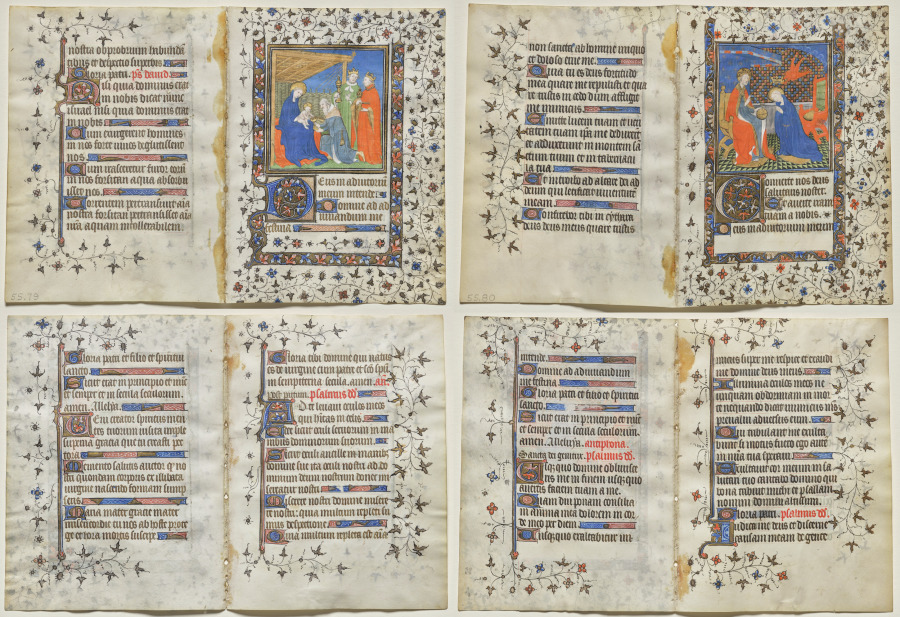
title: Pair of Bifolio from a Book of Hours: Adoration of the Magi and Coronation of the Virgin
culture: France, Paris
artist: workshop of Boucicaut Master (French, Paris, active about 1410–25)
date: c. 1415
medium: ink, tempera, and gold on vellum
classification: Manuscript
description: Books of hours were devotional books popular in the Middle Ages. Meant for laypeople, or those not in the clergy they were used at home and contained daily prayers as well as prayers for specific occasions, such as death, plague, warfare, travel, or bad weather. The heart of every book of hours is the Hours of the Virgin. With this set of prayers, the reader asked the Virgin Mary to intercede on their behalf. The Adoration of the Magi opens sext, the sixth hour of the day or noon. The Coronation of the Virgin begins compline, which is before retiring.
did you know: All books of hours contain the same basic sections and were highly customizable.